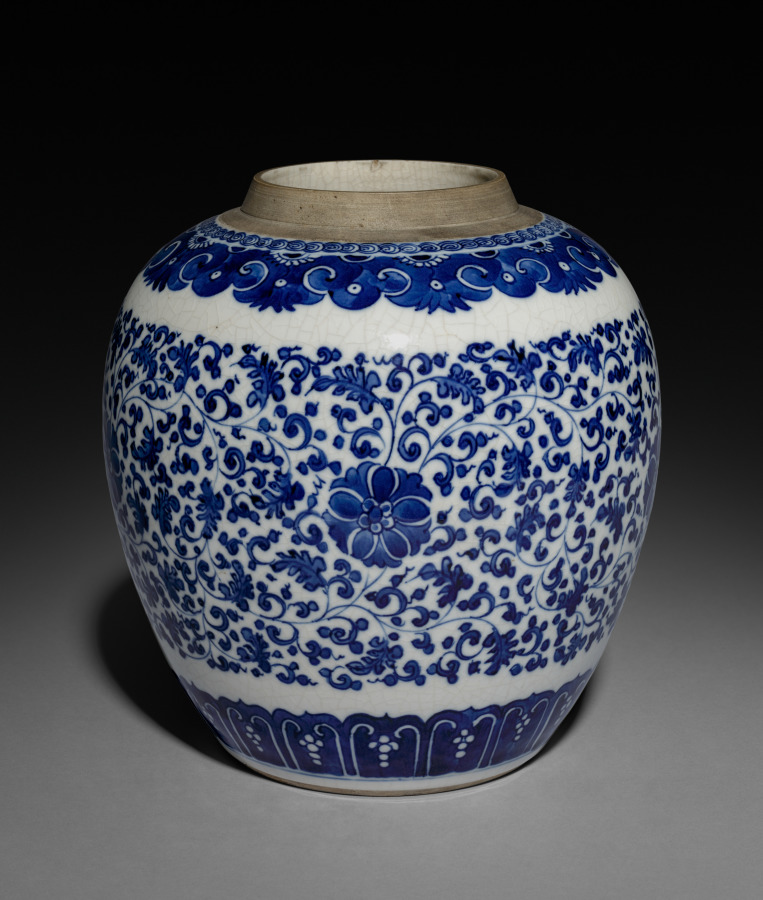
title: Ginger Jar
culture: China, Qing dynasty (1644–1911), Qianlong reign (1736–95)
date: 1736–95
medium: porcelain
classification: Ceramic